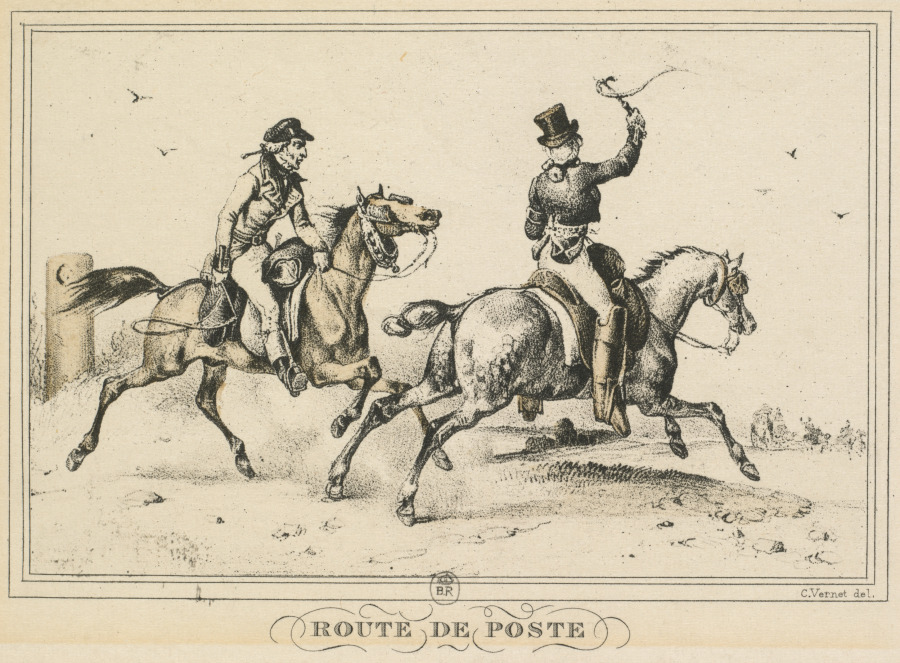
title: Scenes of Daily Life, Roads and Paths: Mail Route (Scènes de la vie quotidienne, Route et Chemins: Route de Poste)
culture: France, 19th century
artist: Carle Vernet (French, 1758–1836)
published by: Bance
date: 1817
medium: lithograph gravure en couleurs a l'aquantinte par Debucourt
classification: Print